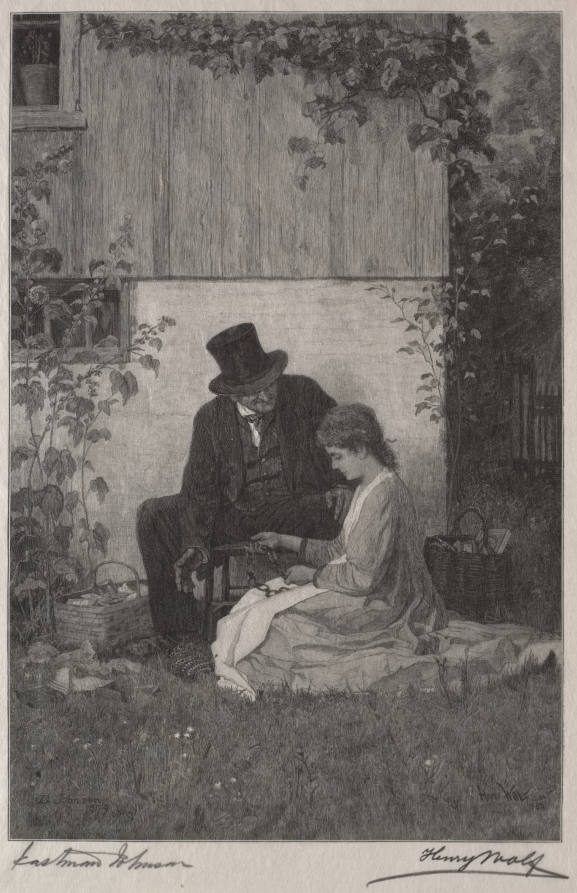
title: The New England Peddler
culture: America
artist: Henry Wolf (American, 1852–1916)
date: 1887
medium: wood engraving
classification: Print